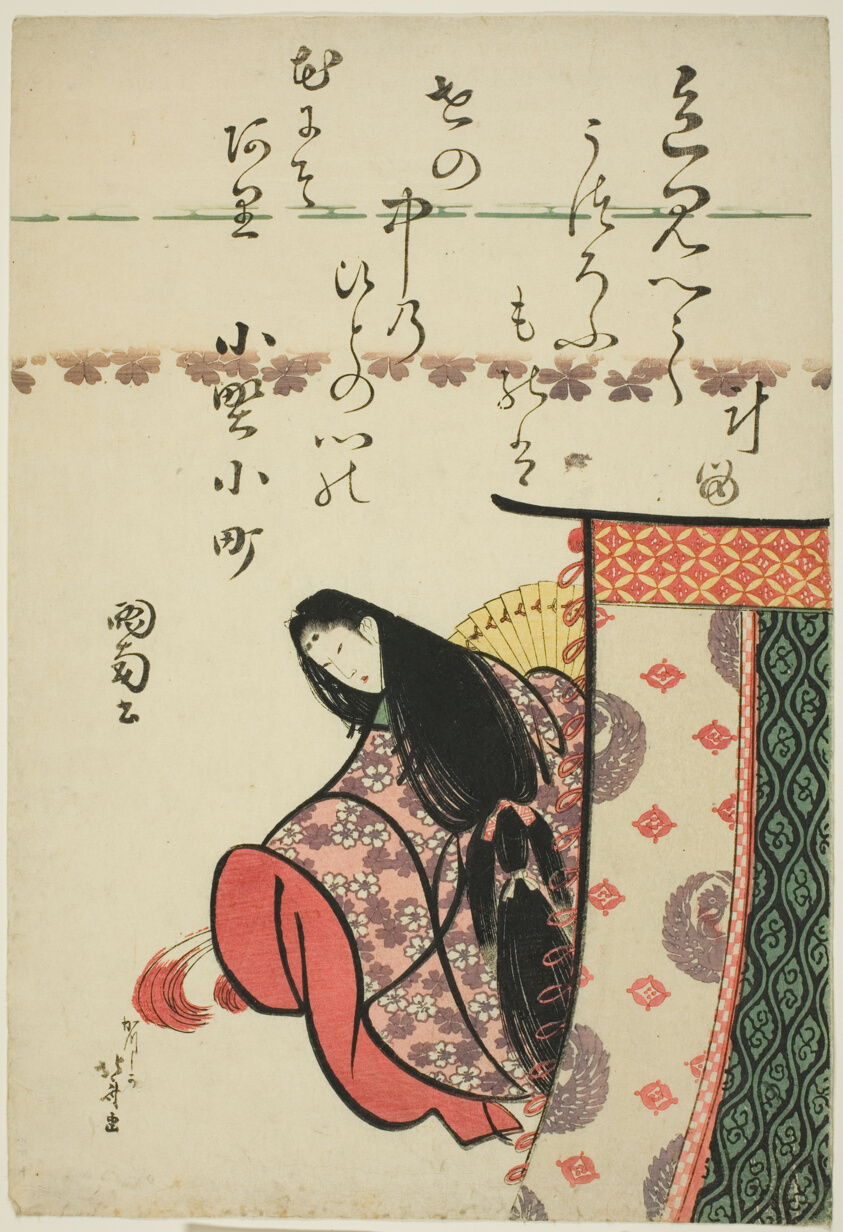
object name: Print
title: The Poetess Ono no Komachi, from the series Six Immortal Poets (Rokkasen)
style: Japanese (culture or style)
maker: Katsushika Hokusai 葛飾 北斎; Japanese, 1760-1849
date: c. 1810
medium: Color woodblock print; oban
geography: Japan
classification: woodblock print; print; asian art